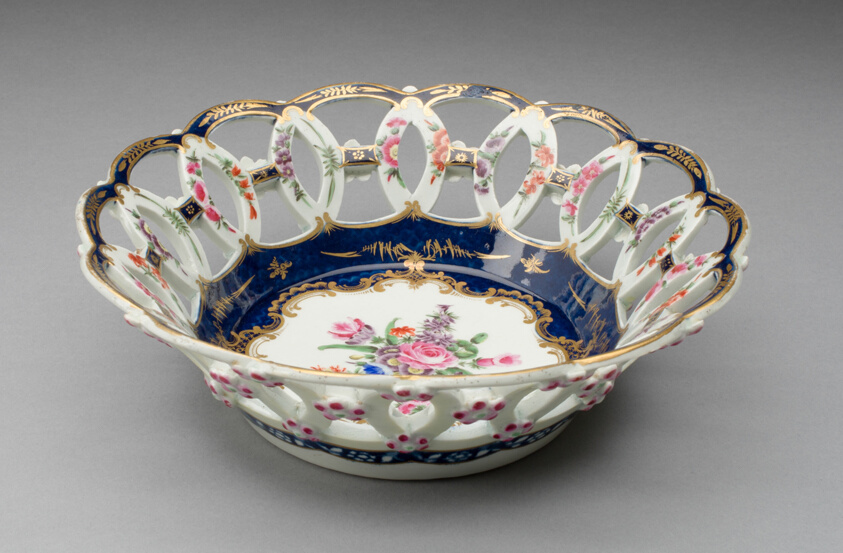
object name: Ceramics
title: Dessert Basket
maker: Worcester Porcelain Factory (Warmstry House Period, 1751–1783); Worcester, England, founded 1751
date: c. 1770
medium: Soft-paste porcelain, underglaze blue, polychrome enamels and gilding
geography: Worcester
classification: tableware; porcelain; european decorative arts; ceramics